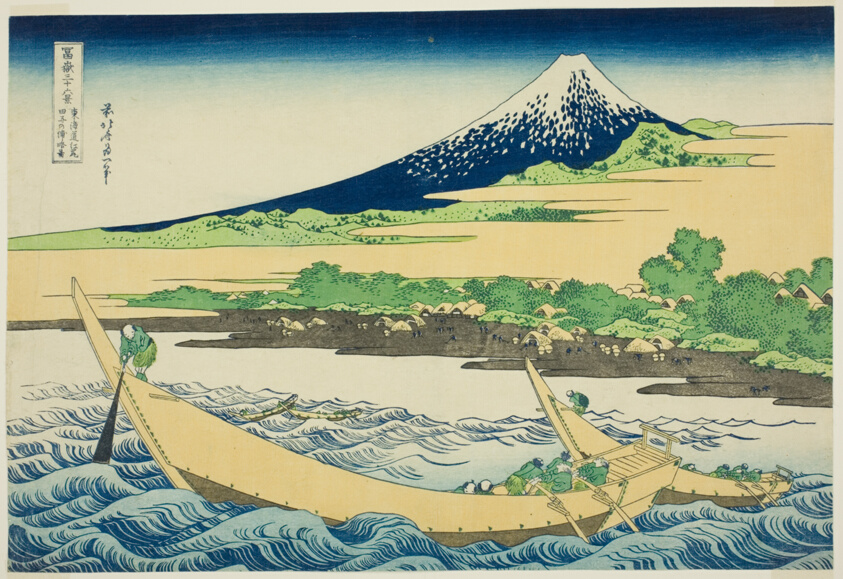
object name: Print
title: Tagonoura Bay near Ejiri on the Tōkaidō (Tōkaidō Ejiri Tagonoura ryakuzu), from the series Thirty-Six Views of Mount Fuji (Fugaku sanjūrokkei)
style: Japanese (culture or style)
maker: Katsushika Hokusai 葛飾 北斎; Japanese, 1760-1849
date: 1830-33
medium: Color woodblock print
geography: Japan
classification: woodblock print; print; asian art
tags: landscapes